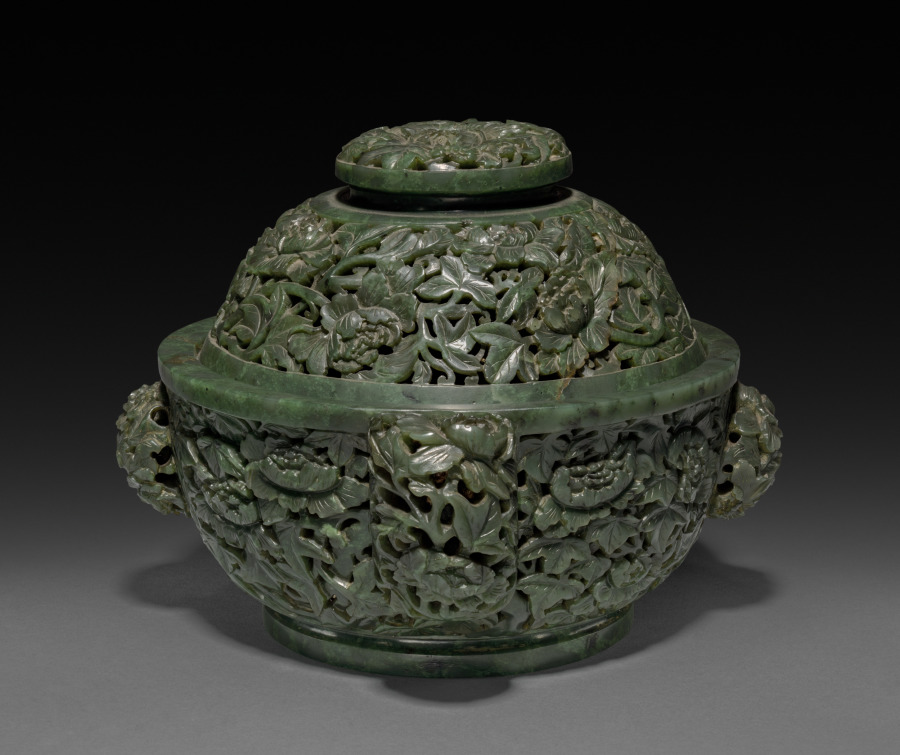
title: Fragrance Container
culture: China, Qing dynasty (1644–1911), Qianlong reign (1736–95)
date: 1736–95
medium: jade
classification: Jade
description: In the Qing (1644–1911) dynasty, luxury items became more affordable to larger parts of the society, including women, merchants, and literati in non-official positions. Imperial patronage and a growing urban population encouraged consumption of luxury goods and local craftmanship. This spinach-green jade incense burner has pierced floral designs and four pierced floral handles. It illustrates the superb carving skills and the creative mind of its accomplished creator, who sought clients on a competitive market